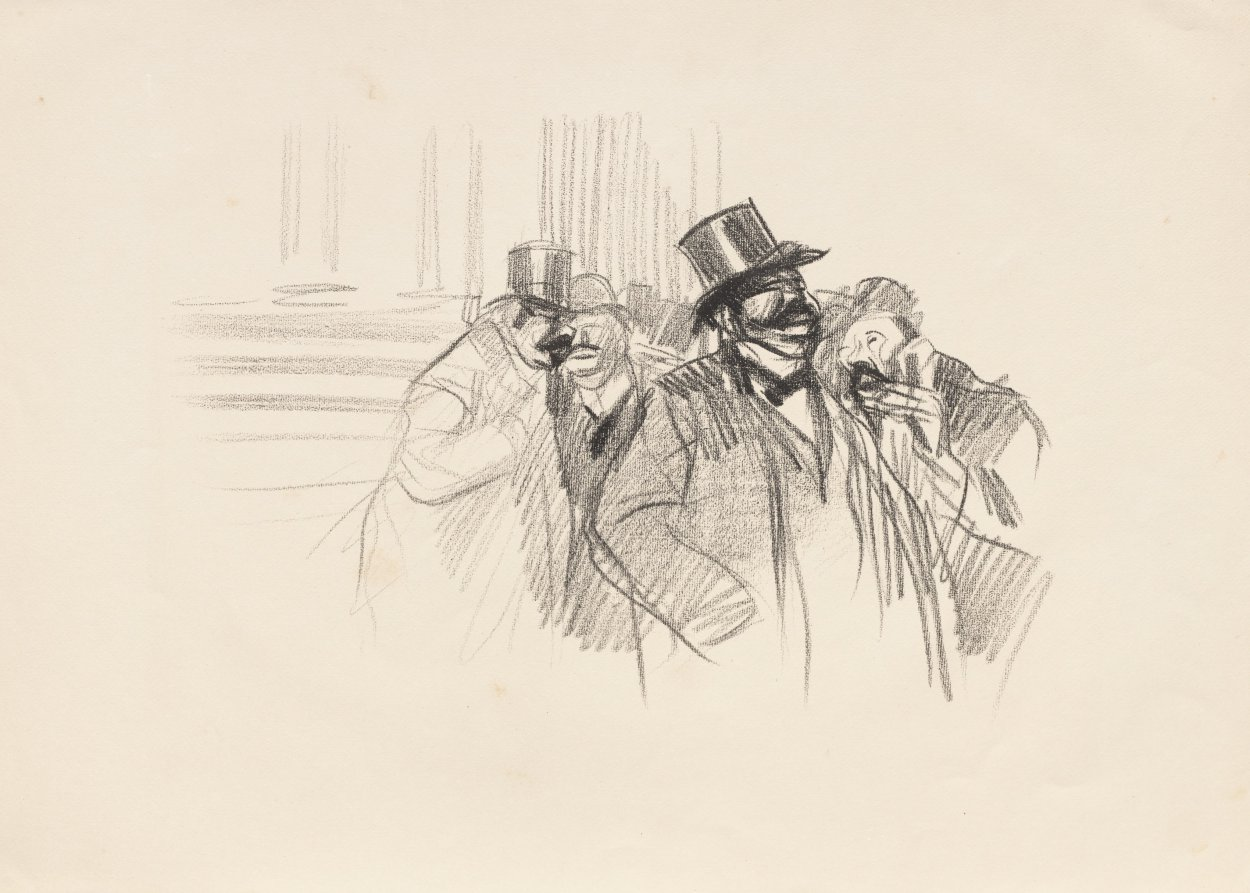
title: At the Stock Exchange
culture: France, late 19th - early 20th century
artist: Jean Louis Forain (French, 1852–1931)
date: c. 1900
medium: lithograph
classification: Print